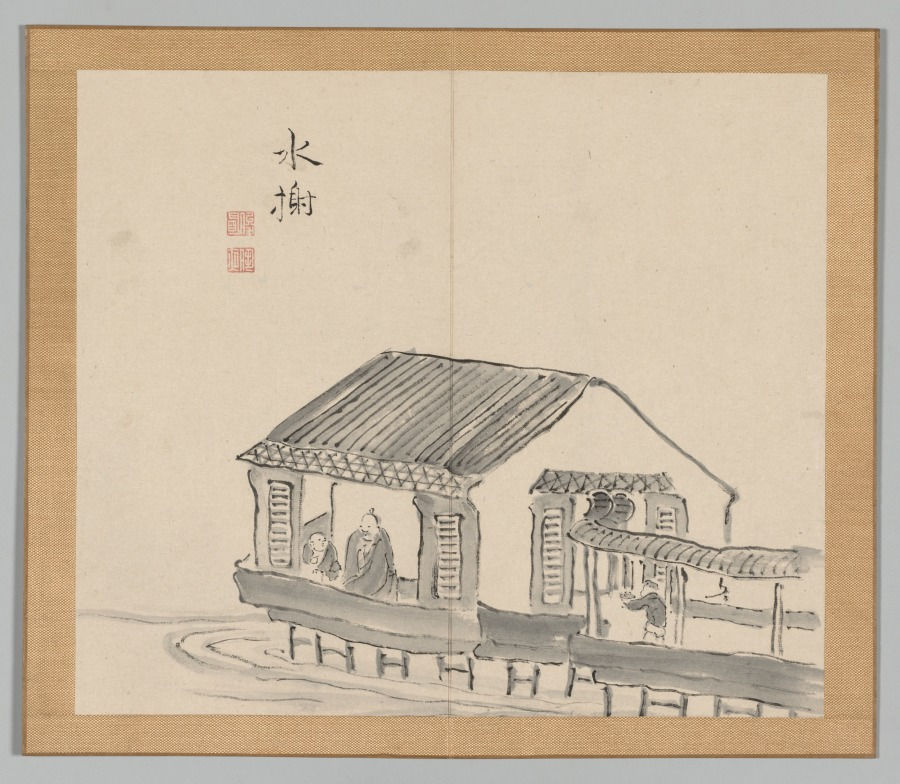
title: Reverberations of Taiga, Volume 2 (leaf 29)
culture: Japan, Edo period (1615–1868)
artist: Aoki Shukuya (Japanese, d. 1802)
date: mid- to late 1700s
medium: double-leaf from a pair of albums; ink and light color on paper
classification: Portfolio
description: Traditionally, young painters in Japan began their studies with an established master-painter. The master's compositions invariably became models that the apprentice copied to learn various ink and brush techniques. Shukuya was a pupil of the famous Kyoto artist Ikeno Taiga, whose style is reflected in these sketches of rocks, trees, and mountains.